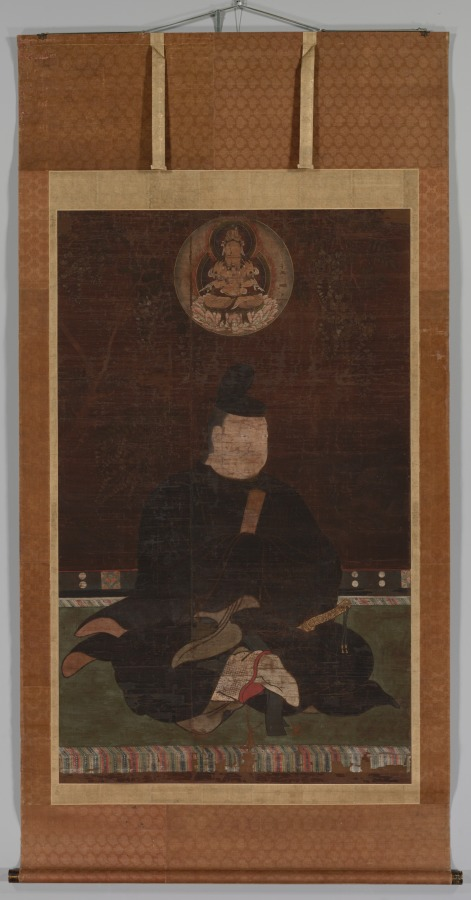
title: Fujiwara no Muchimaro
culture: Japan, Kamakura period (1185–1333)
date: 1200s or 1300s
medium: Hanging scroll; ink, color, gold, and cut gold on silk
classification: Painting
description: This portrait of Fujiwara no Muchimaro (680–737), a grandson of Fujiwara no Kamatari (614–669), includes an image of Buddha Dainichi Nyorai above his head. By situating the image of Dainichi there, this painting would seem to assert that Muchimaro is an avatar of Dainichi. In the same way that kami could be identified with Buddhist counterparts, powerful humans could also be seen as manifestations of Buddhist deities. A similar painting is at Eizanji in Nara, of which Muchimaro is known as the founder. It was once a branch temple of Kōfukuji, the Fujiwara family temple.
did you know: The boughs of wisteria appearing in the background symbolize the figure's status as a Fujiwara family member.